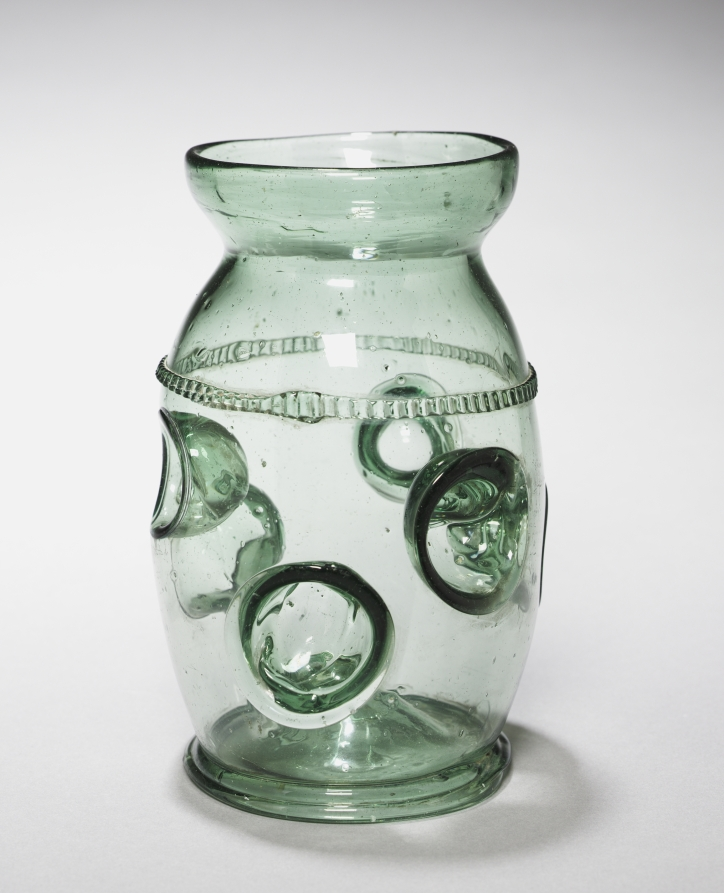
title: Tumbler (Daumenglas)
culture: Germany, late 16th-early 17th century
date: c. 1600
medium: green glass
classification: Glass